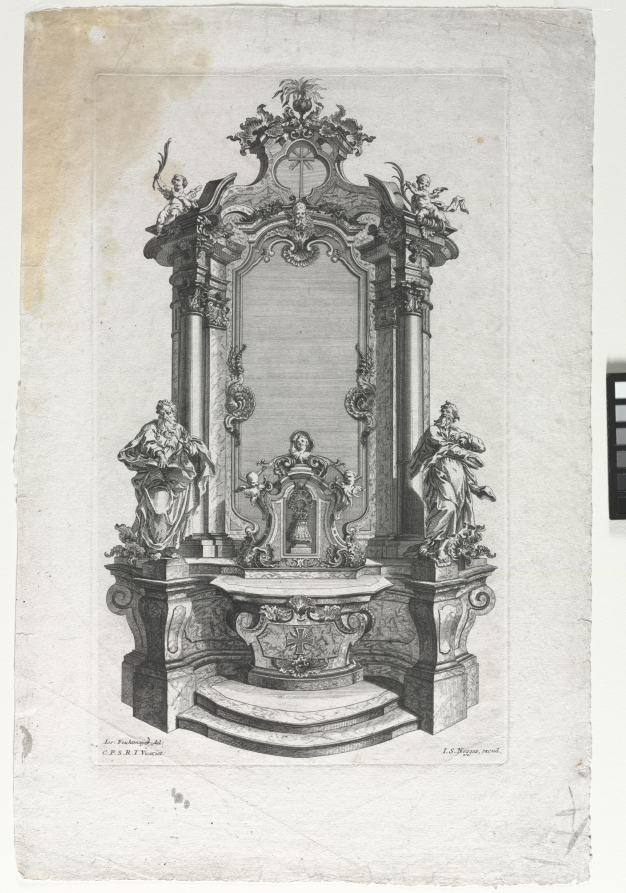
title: Model for Altar for Woodcarvers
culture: Germany, 18th century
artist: Gottfried Bernhard Götz (German, 1708–1774)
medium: engraving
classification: Print